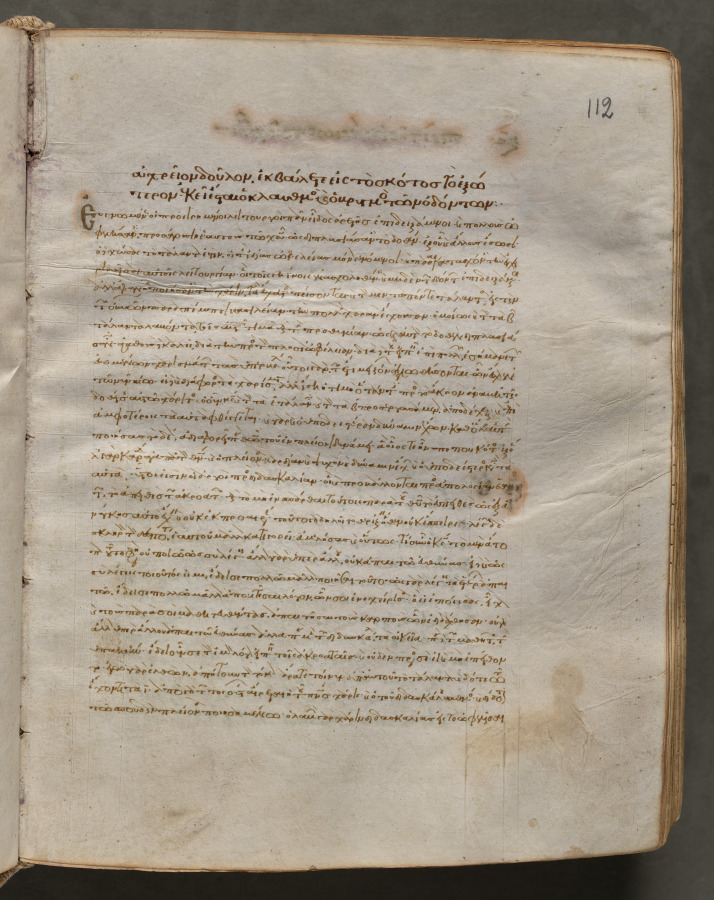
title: Text, folio 112 (recto), from a Gospel Book with Commentaries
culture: Byzantium, Constantinople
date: c. 1000–1100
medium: ink, tempera, and gold on vellum; leather binding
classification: Bound Volume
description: Each of the four gospels in this book opens on a page with brilliantly illuminated borders depicting the author of the text as well as birds-principally peacocks, symbols of the immortality of the soul-and fountains, representing the fountain of life and the salvation of the soul. This volume consists of 428 leaves with texts in Greek. Its level of sophistication suggests that it was probably written and decorated in a monastery in Constantinople.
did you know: Gospel Books were carried in procession through Byzantine churches.